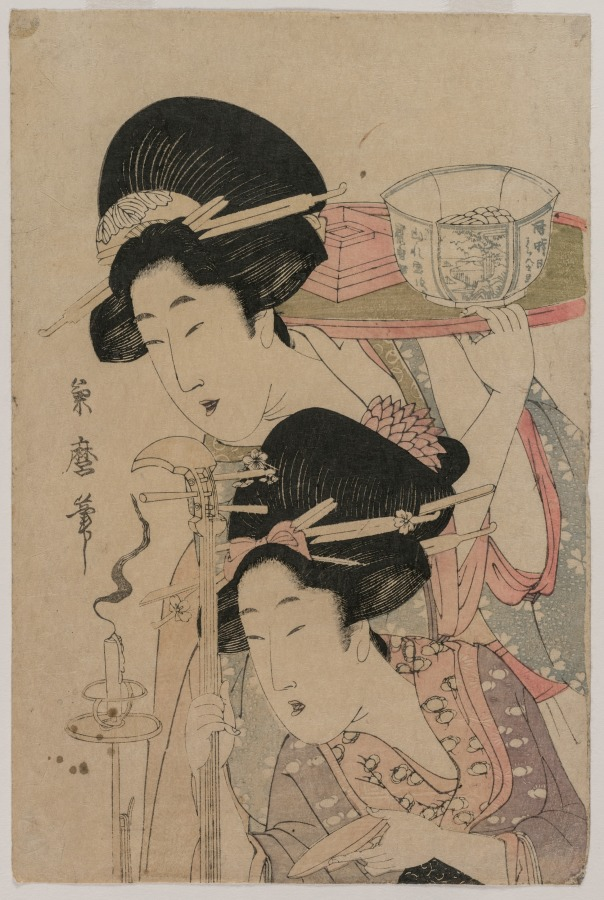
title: Two Geishas beside a Candle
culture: Japan, Edo period (1615–1868)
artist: Kitagawa Tsukimaro (Japanese, d. 1830)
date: mid 1800s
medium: color woodblock print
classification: Print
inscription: Signature: Kikumaro hitsu